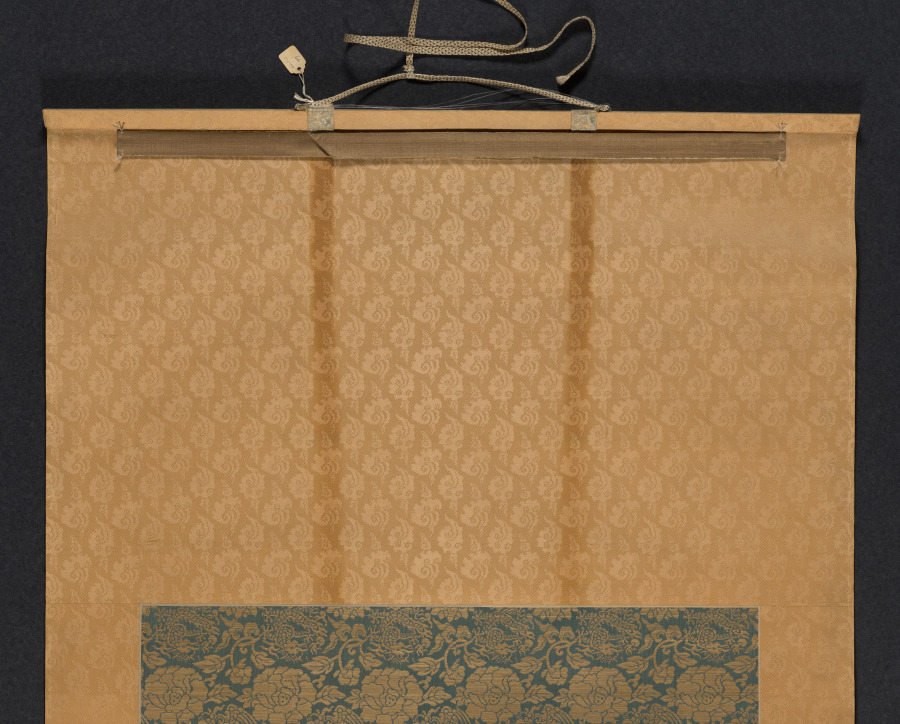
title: Samantabhadra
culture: China, Southern Song dynasty (1127-1279)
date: 1100s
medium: hanging scroll; ink and color on silk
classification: Painting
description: In the last chapter of the Lotus Sutra, one of the principal Buddhist texts, the great Bodhisattva Samantabhadra is described advancing to earth, riding on a six-tusked elephant, and proclaiming himself protector of the faithful. More frequently, he is shown with Bodhisattva Manjusri as the attendants of Shakyamuni (the historical Buddha). This scroll is probably the left panel in a triptych (group of three paintings) portraying these deities.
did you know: Samantabhadra holds a lotus with a sutra on top of the blossom.